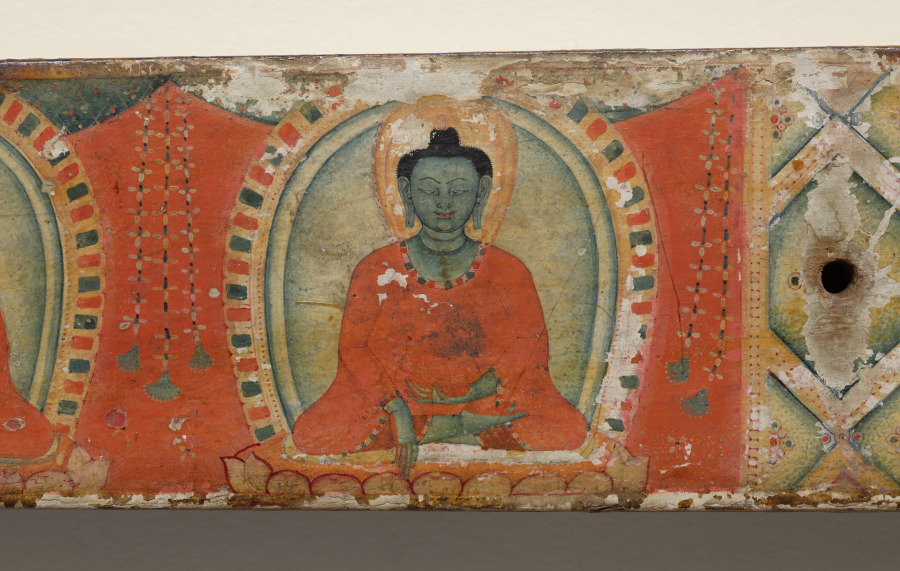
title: Ratnasambhava, Akshobhya, Vairochana with attendants, Amitabha, and Amoghasiddhi, Top cover, from a Manuscript of the Perfection of Wisdom in Eight Thousand Lines (Ashtasahasrika Prajnaparamita-sutra)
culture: Eastern India, Bihar, Vikramashila Monastery. Paintings: Nepal, Kathmandu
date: Sunday, September 14, 1119 (year 239 of the Newar Samvat in the month of Ashvina)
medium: Covers: Gum tempera, colors, and paper on wood; pages: gum tempera and ink on palm leaves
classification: Painting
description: The inner side of the top cover is fully painted with images of the Five Cosmic Buddhas of Esoteric Buddhism. Each one has a different color, meaningful hand gesture, and is associated with a spatial direction. In the center is the white Vairochana holding his hands in the enlightenment mudra. On either side of the binding holes are the other four Cosmic Buddhas Akshobyha (blue, earth-touching mudra, east) and Amitabha (red, meditation mudra, west), and on the ends are Ratnasambhava (gold, gift-giving mudra, south) and Amoghasiddhi (green, fear-not mudra, north). The top side is covered with ritual materials indicating that this book was once an object of worship.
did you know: The Five Tathagatas could be the source of visions that would help Buddhist practitioners on the path to enlightenment.